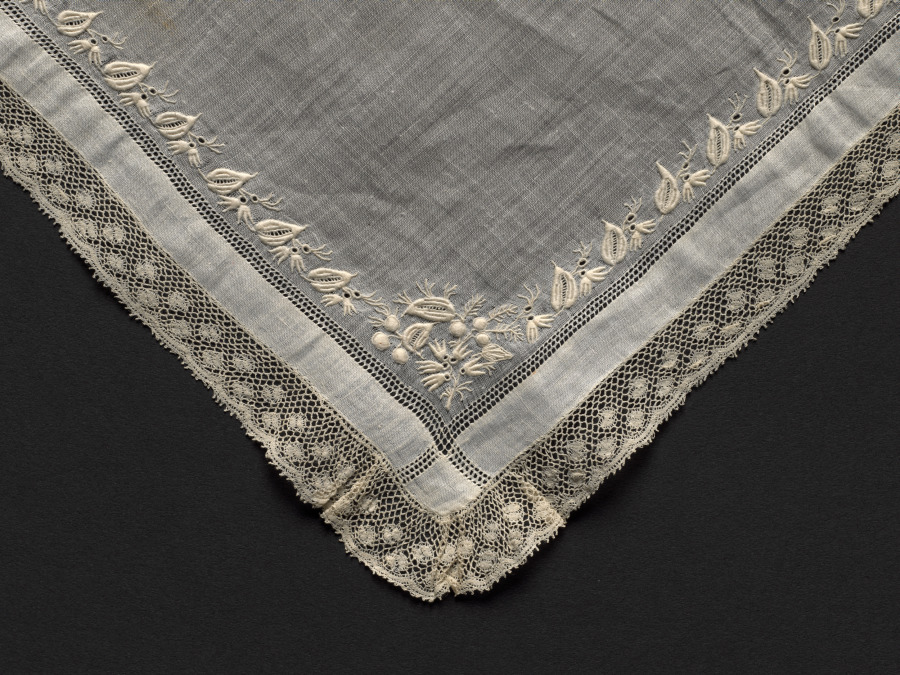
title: Lace Handkerchief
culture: France or Flanders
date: 1800s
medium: Plain weave linen ground; needle lace (drawnwork) and bobbin lace (Valenciennes lace) edging and embroidery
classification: Embroidery